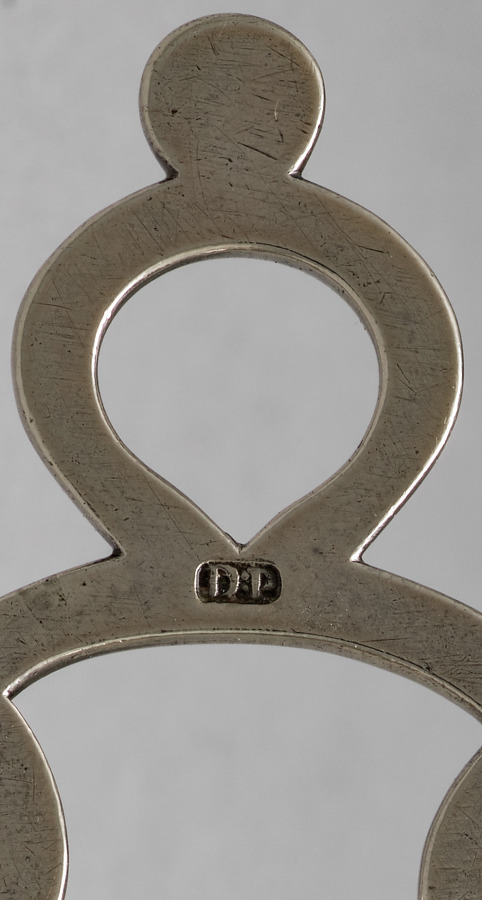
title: Strainer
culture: America, Massachusetts, Boston and Salem, 18th century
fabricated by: Daniel Parker (American, 1726–1785)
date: c. 1765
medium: silver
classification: Silver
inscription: engraved "H" over "B + H" in shaded block letters on side of bowl.